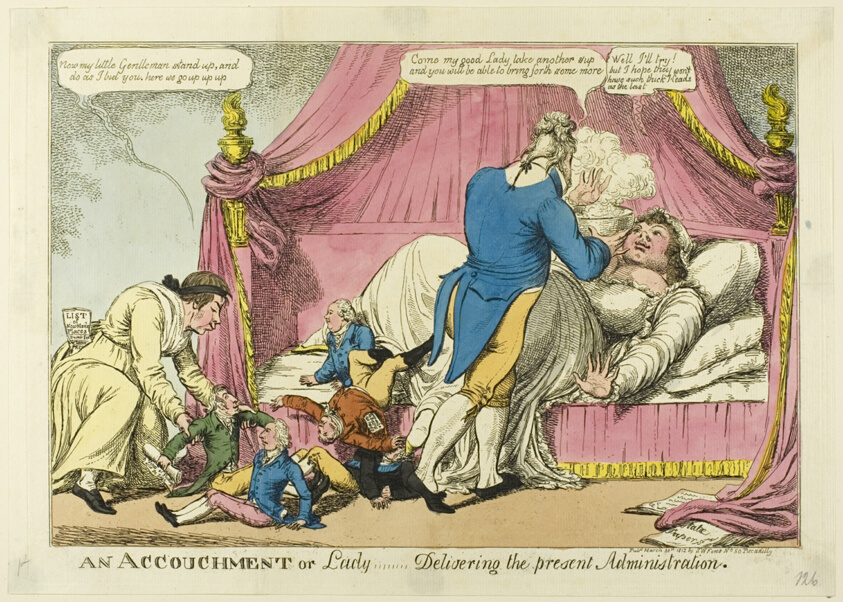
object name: Print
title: An Accouchment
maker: Charles WIlliams (English, active 1797-1830); published by S. W. Fores (English, active 1785-1825)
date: published March 30, 1812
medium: Hand-colored etching on ivory laid paper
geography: England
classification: etching; print; prints and drawing